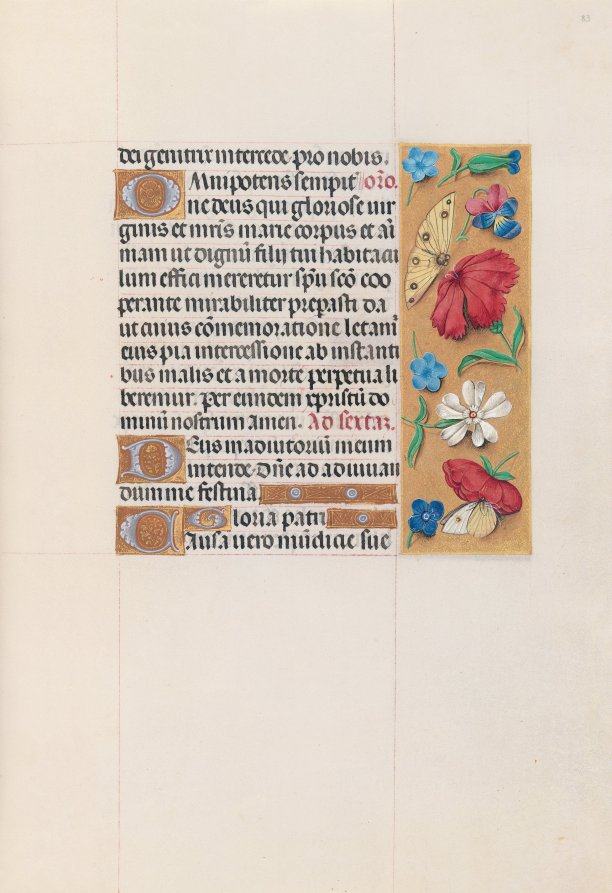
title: Hours of Queen Isabella the Catholic, Queen of Spain: Fol. 83r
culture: Flanders, Ghent and Bruges, late 15th century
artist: Master of the First Prayerbook of Maximillian (Flemish, c. 1444–1519)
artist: and Associates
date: c. 1500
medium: ink, tempera, and gold on vellum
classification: Bound Volume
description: This manuscript was illuminated by a circle of at least five highly organized manuscript painters active in the Flemish cities of Ghent and Bruges. The principal illuminator was Alexander Bening, who painted the majority of the book's miniatures. Manuscripts produced by this circle of artists are renowned for the decoration of their borders, which typically feature a rich variety of realistically-painted flowers, birds, and butterflies. This prayer book, called a book of hours, was intended not for a cleric, but for the private devotions of a lay person-in this case, Isabella the Catholic, Queen of Spain (1451-1504). Isabella's coat of arms embellishes the book's frontispiece. It is unlikely that the book was commissioned by the Queen herself; rather, she probably received it as a diplomatic gift from someone courting her patronage, perhaps Cardinal Francisco Jimenez de Cisneros. A Franciscan friar, Jimenez was dependent upon Isabella for his advancement, first to the post of Queen's confessor in 1492, and then to Archbishop of Toledo in 1495.